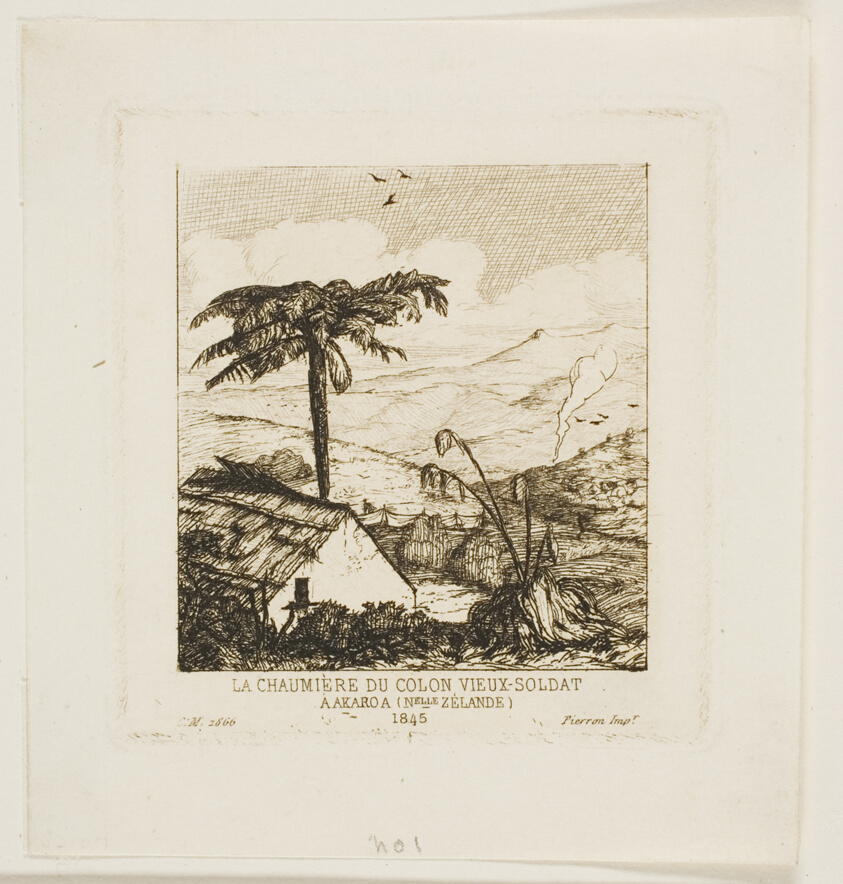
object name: Print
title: The Old Soldier's Thatched Cottage, Akaroa, 1845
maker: Charles Meryon (French, 1821-1868); printed by Pierron (French, 19th century)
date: 1866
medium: Etching and drypoint in warm black on ivory laid paper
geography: France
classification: etching; print; prints and drawing